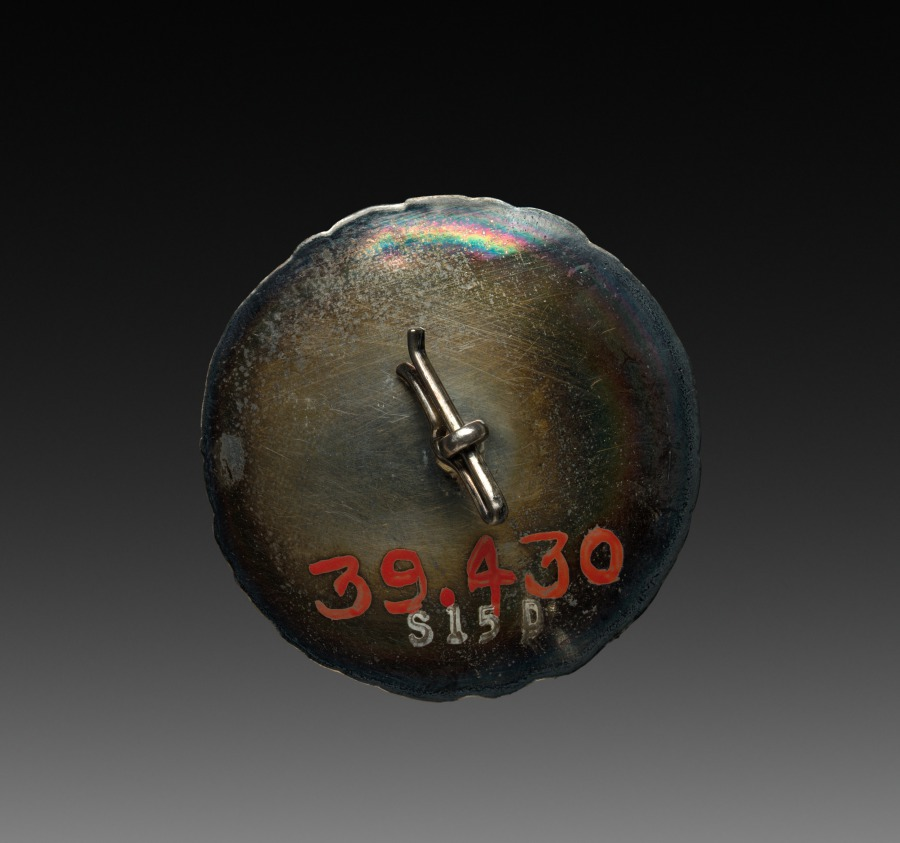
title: Button with Dragon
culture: Japan, Meiji period (1868–1912) to Taishō period (1912–26)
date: early 1900s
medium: One of a set of five buttons; cast (?) silver with relief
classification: Metalwork